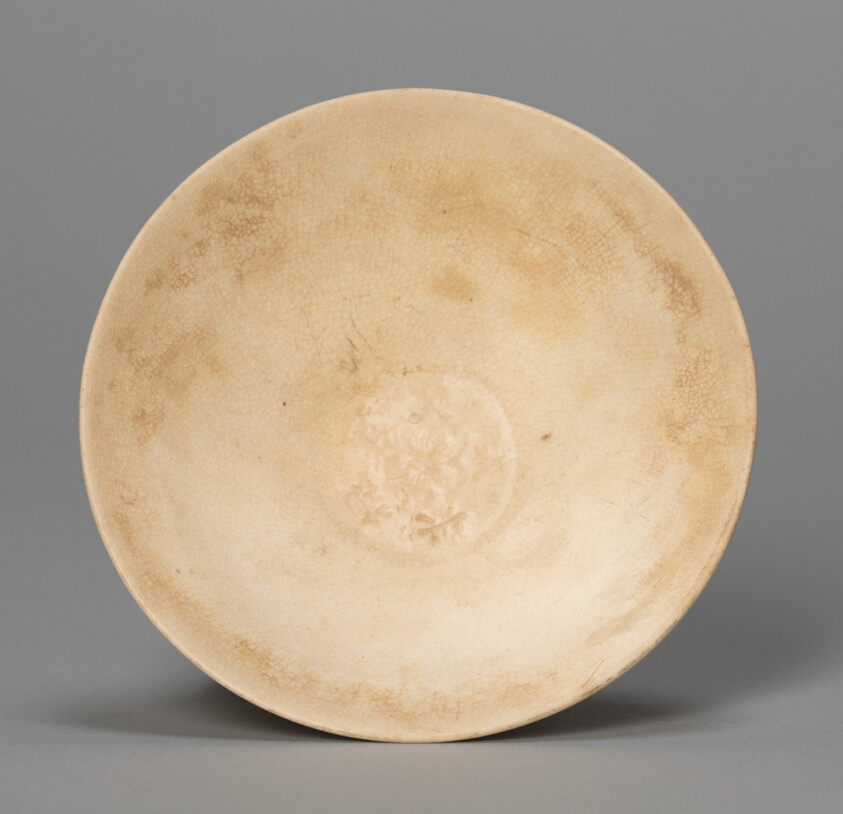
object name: Vessel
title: Small Bowl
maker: China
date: Ming dynasty (1368–1644)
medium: Porcelain with brownish crackle glaze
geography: China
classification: porcelain; asian art; ceramics